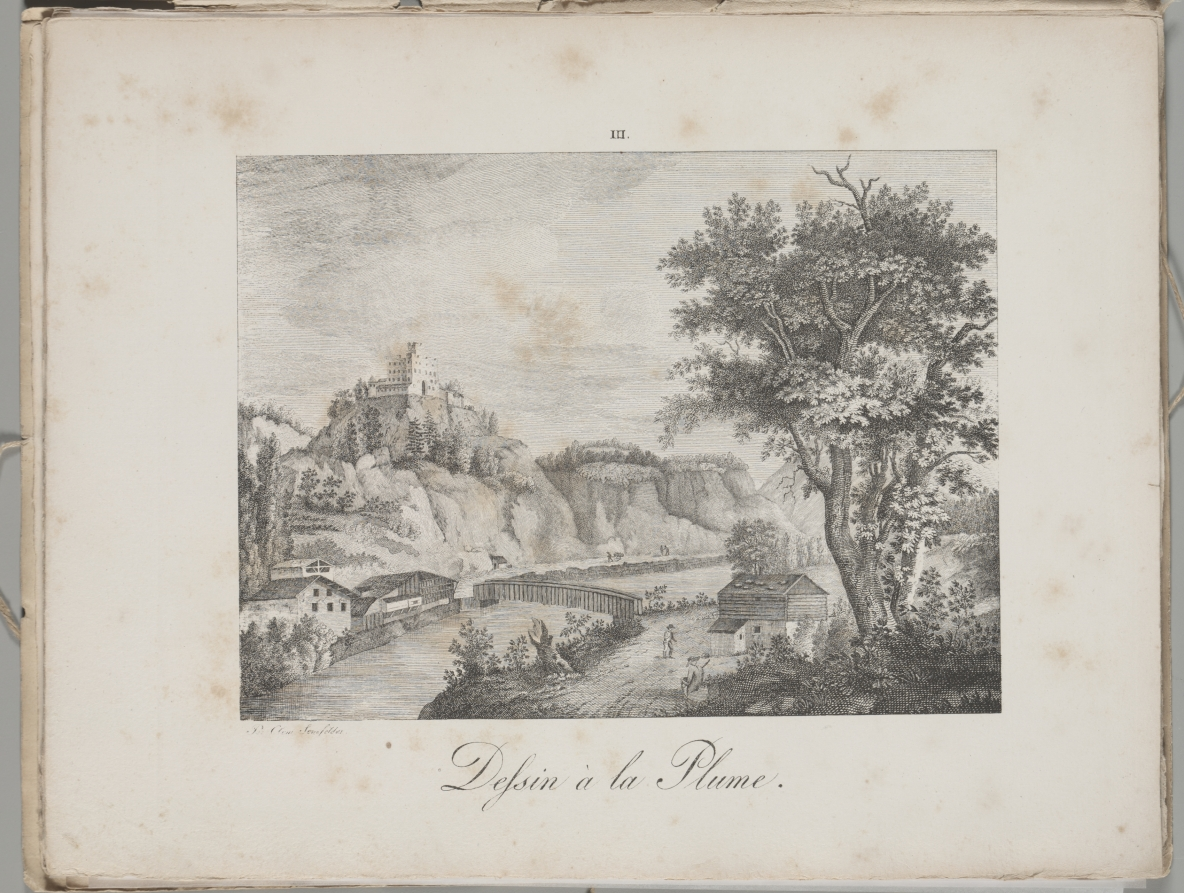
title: Art of the Lithograph: Landeck in Tirol, Plate III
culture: Germany, 19th century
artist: Alois Senefelder (German, 1771–1834)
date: 1819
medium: lithograph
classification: Portfolio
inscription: On plate: lower left: Par Clem: Senefelder; center, in script: Dessin à la Plume; upper center: III